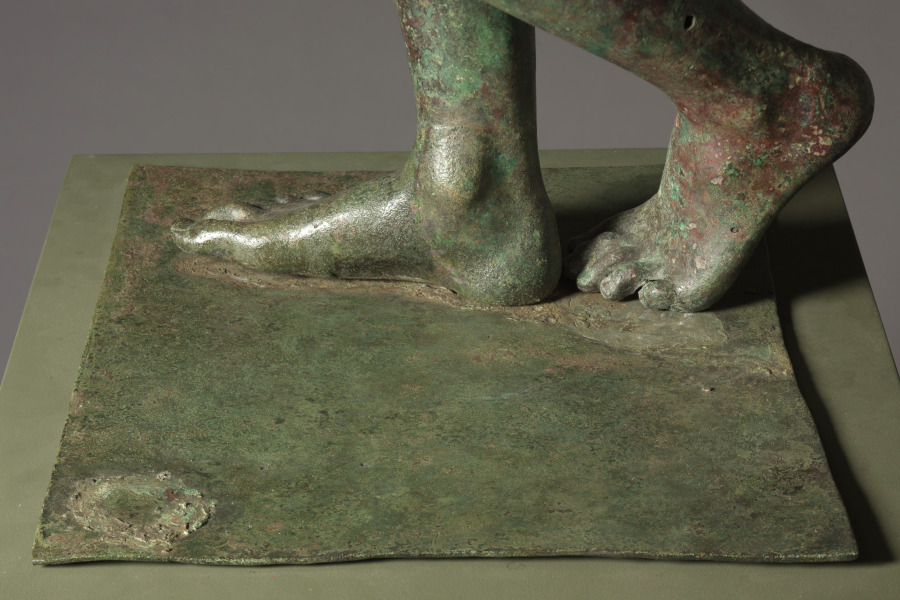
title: Baseplate for the Cleveland Apollo: Apollo Sauroktonos (Lizard-Slayer) or Apollo the Python-Slayer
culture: Greece, Athens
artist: possibly by Praxiteles (Greek, Athenian, c. 400–330 BCE)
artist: or Follower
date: c. 350–200 BCE, or possibly later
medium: bronze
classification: Sculpture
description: The baseplate is nearly square in shape, but two edges are noticeably concave. A modern hole facilitates mounting (with a modern rod in the right leg), and marks show the placement of both feet, once attached with lead solder. A nearly circular lead solder mark located at the front left corner likely corresponds to the placement of a small tree, now lost.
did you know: Most large-scale ancient bronze sculptures stood on bases made of stone rather than bronze.